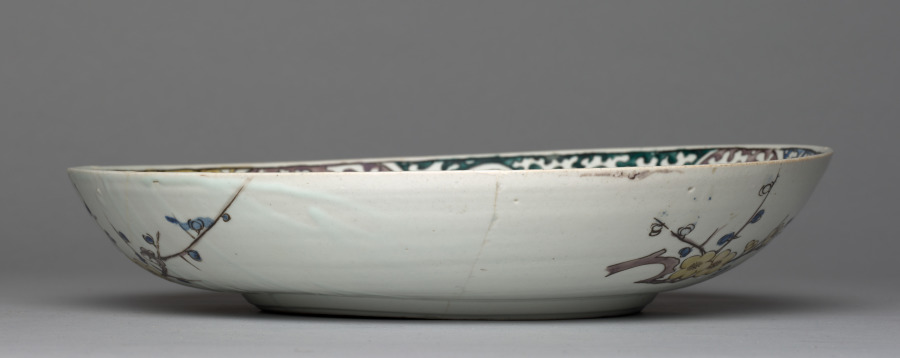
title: Plate with Bird and Flower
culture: Japan, Meiji period (1868–1912) or Taishō period (1912–26)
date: early 1900s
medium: Porcelain with overglaze enamel (Ko-Kutani revival style)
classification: Ceramic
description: This dish is a sophisticated example of later ceramists reinterpreting earlier styles of Japanese porcelain. The colors and patterns used look similar to some works produced on the island of Kyushu in the1600s and 1700s. However, the idea to combine alternating blocks of yellow, green, purple, and blue with a "Chinese grasses" (karakusa) pattern around the rim of the dish is one hit upon in the early 1900s by an artist familiar with the colors and patterns of earlier works.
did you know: Porcelain must be fired at a high temperature to achieve its strength and semitranslucent surface.